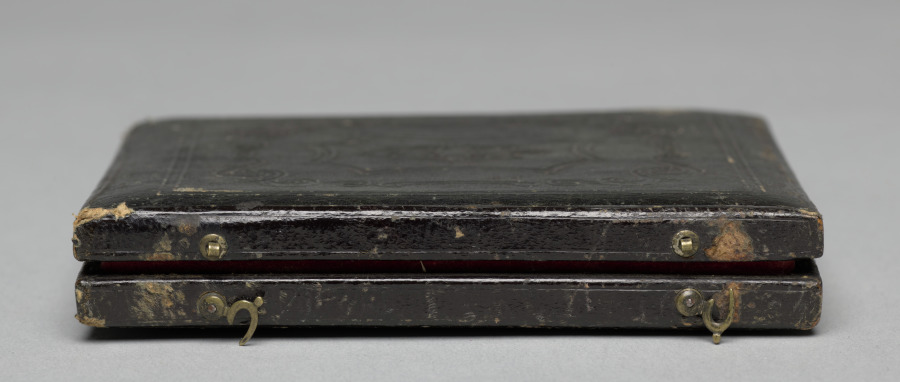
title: The Map Maker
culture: America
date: c. 1843–45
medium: daguerreotype, quarter plate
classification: Photograph